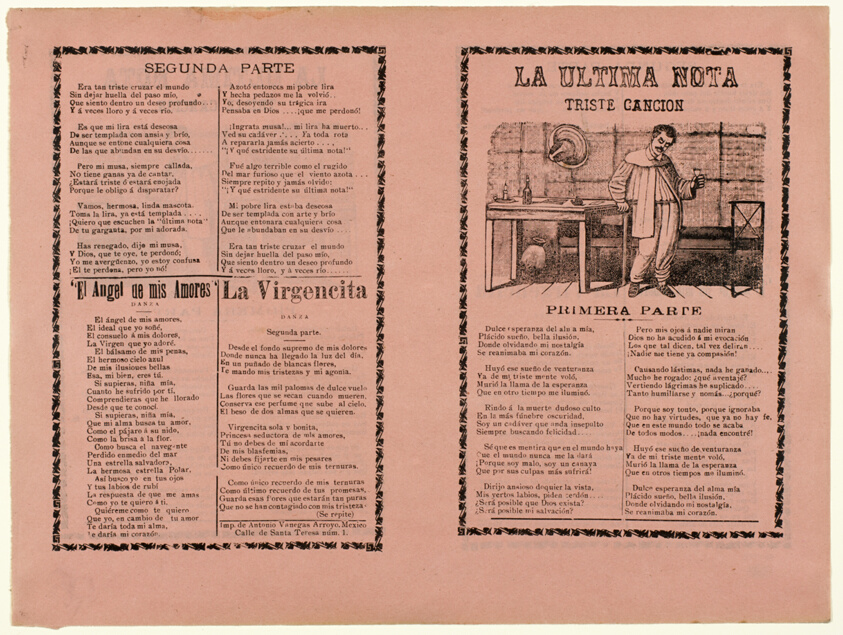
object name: Print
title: The Final Note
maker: José Guadalupe Posada (Mexican, 1852-1913)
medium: Photo relief etching with relief engraving on tan wove paper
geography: Mexico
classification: relief etching; print; prints and drawing